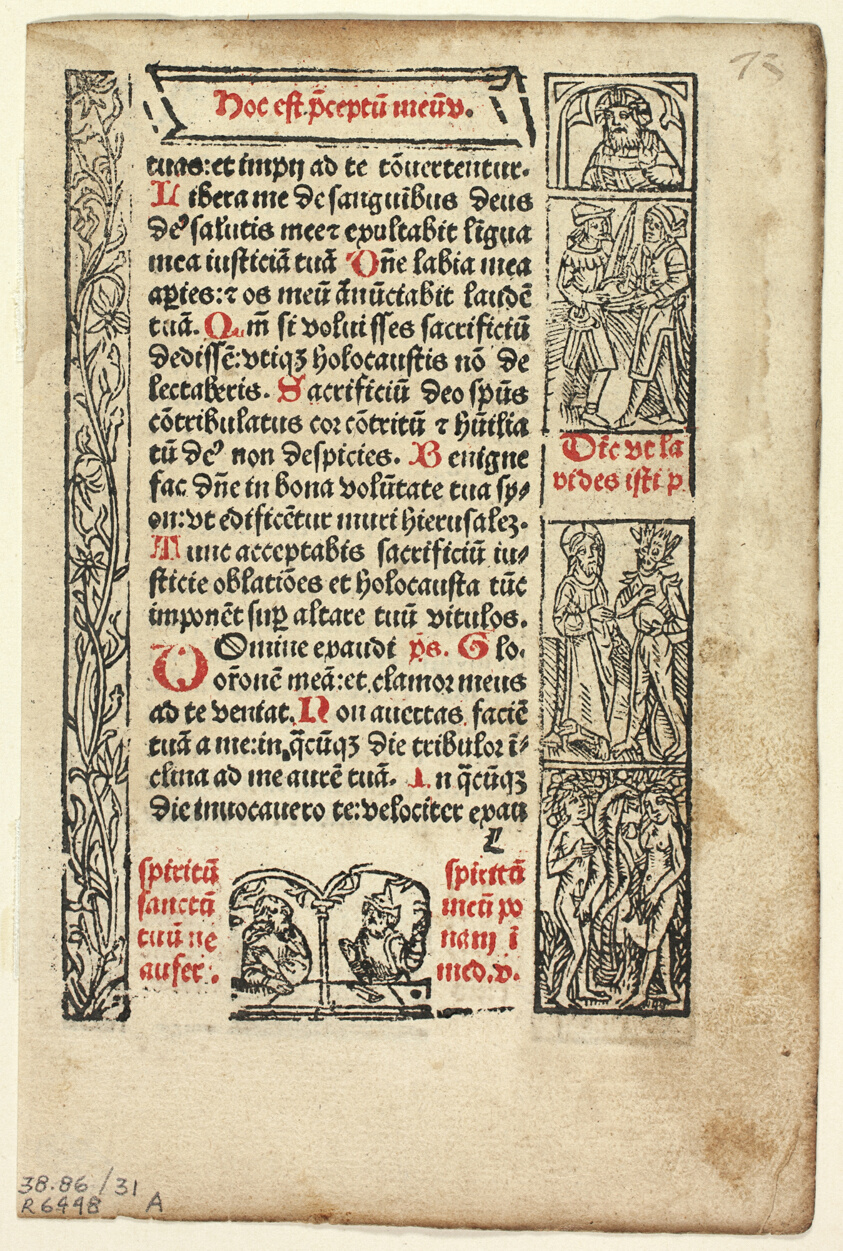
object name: Print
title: Leaf from Cursus Beate Marie Virginis (The Journey of the Blessed Virgin Mary), Plate 31 from Woodcuts from Books of the 15th Century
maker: Unknown Artist (possibly Basle, late 15th century); printed and published by Marcus Reinhard (German, active 1491–c. 1497); portfolio text by Wilhelm Ludwig Schreiber (German, 1855–1932)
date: c. 1497, portfolio assembled 1929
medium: Woodcut and letterpress in black and red (recto and verso) on cream laid paper, tipped onto cream wove paper mat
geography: Switzerland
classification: woodcut; print; prints and drawing